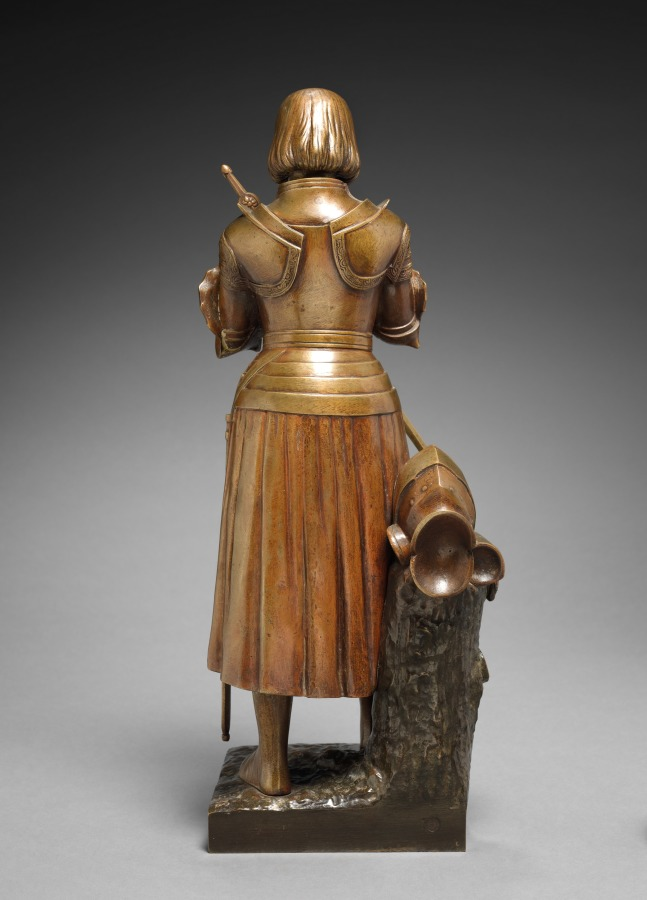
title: St. Joan of Arc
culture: France, 19th century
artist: Princesse Marie-Christine d' Orleans (French, 1813–1839)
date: 1836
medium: bronze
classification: Sculpture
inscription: Signed on top of base: "Marie d'Orléans."; inscribed on left side of base: "Susse Fres Edts Paris."